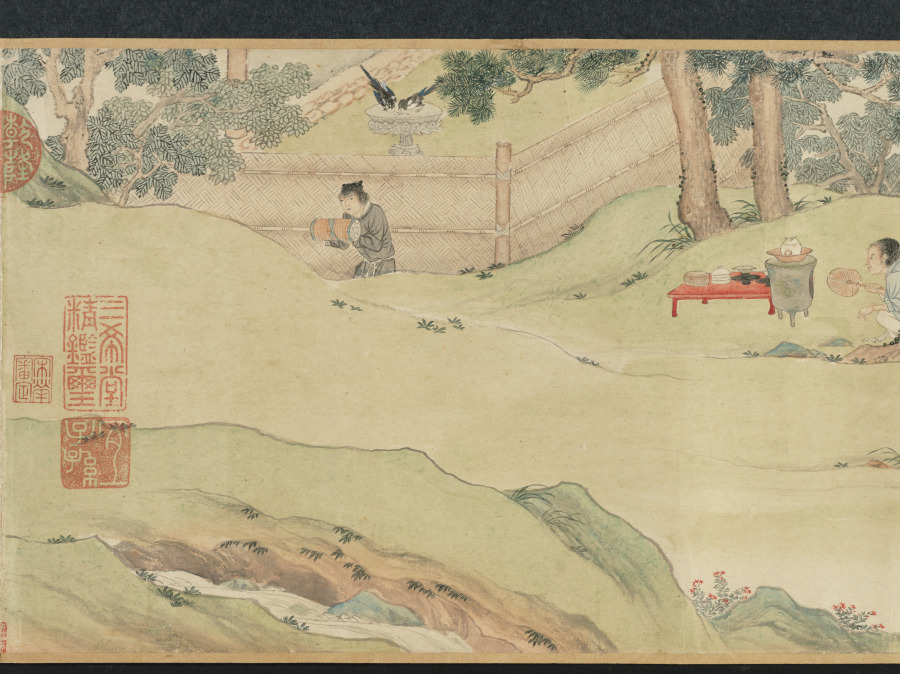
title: Zhao Mengfu Writing the Heart (Hridaya) Sutra in Exchange for Tea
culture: China, Ming dynasty (1368–1644)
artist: Qiu Ying (Chinese, 1494–1552)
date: 1542–43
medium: handscroll, ink and light color on paper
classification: Painting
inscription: Inscription accompanying text of "Heart" sutra, by Wen Zhengming 文徵明 (1470-1559): Zhengming 徵明, written in a boat at Kunshan 崑山, on the twenty-first day of the ninth month, in the renyin 壬寅 year, the twenty-first year of the Jiajing era [1542].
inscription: Colophon by Wang Shih-mou: Chou Yü-shün [Feng-lai] of K'un-shan was a scholarly, refined connoisseur of antiquities. He had acquired the poem written by Chao Ch'eng-chih [Chao Meng-fu] about the exchage of tea for Chao's calligraphy of the Prajna sutra. But the sutra itself, also written by Chao Meng-fu, is lost. He therefore asked Ch'iu Shih-fu [Ch'iu Ying] to do a painting and had Wen Cheng-ming, the artist-in-attendance, write the Hridaya Sutra in the "small, regular" style for replacement. Both works are so excellent that even Chao Meng-fu himself would certainly applaud if he should be reborn to see them. I, Shih-mou, had gotten possession of this scroll from the family of Chou Yü-shün, and since it was so wonderfully matched with one of the treasures in my collection. the Hridaya Sutra written by Chao Meng-fu for Priest Li in "running script," like the reuniting of two halves of a jade pi, I completed the scroll with the several colophons written for the "tea-exchange" poem. I did this because the painting of Ch'iu Ying and the calligraphy of Wen Cheng-ming are definitely masterpieces by themselves with absolutely no need to depend on any of the colophons written for the Chao Meng-fu poem. Furthermore, the two sons of Wen Cheng-ming, Shou-ch'eng [Wen P'eng] and Hsiu-ch'eng [Wen Chia]. have each written a colophon explaining the reason for replacing the calligraphy. As their writings are both acceptable for high standard, I didn't want to throw them away. [So by separating these into two scrolls] I was able to get two complete works of art in one clever stroke. I was quite pleased with myself, and hope that those who see this scroll shall not get suspicious because of the missing colophons. Wang Shih-mou wrote in his Jih-sun-chai study, on the first day of the tenth month, in the chia-shen year of the Wan-li era [1584].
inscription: Colophon by Wen P'eng: I-shao [Wang Hsi-chi] wrote in exchange for a flock of geese. Su Tung-po wrote in exchange for meat. Both episodes have become legends of a thousand years. Sung-hsüeh [Chao Meng-fu] "teased" Priest Kung for tea, and the story was immediately immortalized in the poems by all the famous scholars of the times. Indeed, how could one say his humor and elegance are not equal to the ancient worthies? Unfortunately, the poetry has survived but the writing of the sutra is lost. Yü-shün [Chou Feng-lai] therefore asked my father to make up the writing and so here is the complete work of art. Respectfully inscribed by Wen P'eng in the mid-summer of 1543.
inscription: Colophon by Wen Chia: Sung-hsüeh [Chao Meng-fu], in exchanging tea leaves for his writing of the Prajna, had put himself in the company of Yu-chün [Wang Hsi-chih] who exchanged geese for his writing of the Huang-t'ing sutra [the Yellow Chamber, or the Wai-ching ching, a Taoist text attributed to the Yellow Emperor]. However, was this romantic and cultivated gesture really intended for such small things? Actually, he was only proud that the excellence of his calligraphy had made him worthy to be the successor of the Ch'in Dynasty master. Since, very unfortunately, Chao Meng-fu's writing [of the Prajna] was already lost, my father therefore agreed to replace it, and did the calligraphy in the style of the Yellow Chamber. In addition, Yu-shün [Chou Feng-lai] had asked Mr. Ch'iu Shih-fu [Ch'iu Ying] to do a painting of the sutra writing story in the style of Li Lung-mien at the head of the scroll. Now it would seem the entire episode should go down in history for immortality. Respectfully recorded by Wen Chia, on the eighth day of the eighth month, in the year of k'uei-mao [1543]. trans. WKH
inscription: 4 colophons and 23 seals: 1 colophon, dated 1543, and 2 seals of Wen Peng (1498-1573); 1 colophon, dated 1543, and 2 seals of Wen Chia (1501-1583); 1 colophon, dated 1584, and 3 seals of Wang Shih-mou (1536-1588); 2 seals of Chou Feng-lai (16th c.); 3 seals of Sung Lo (1634-1713); 5 seals of the Ch'ien-lung emperor (r. 1736-95); 1 colophon, dated 1902, and 1 seal of Fei Nien-tz'u (1885-1905); 4 seals of Wan-go H. C. Weng (b. 1918); 1 seal unidentified.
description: The Yuan dynasty calligrapher Zhao Mengfu (1254–1322) is said to have transcribed the Heart Sutra for a certain priest named Li in exchange for tea. Later, during the Ming dynasty, the professional painter Qiu Ying from Suzhou painted this scene for his patron. Here, Zhao Mengfu holds a brush and has a piece of paper laid out before him. On the table is an ink stone, an ink stick, and a small water dropper. Drops of water would dissolve the ink stick into liquid ink when it was ground on the flat square stone.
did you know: Qiu Ying was born to a peasant family, but his natural talent led him to a successful career as a professional painter with wealthy patrons.